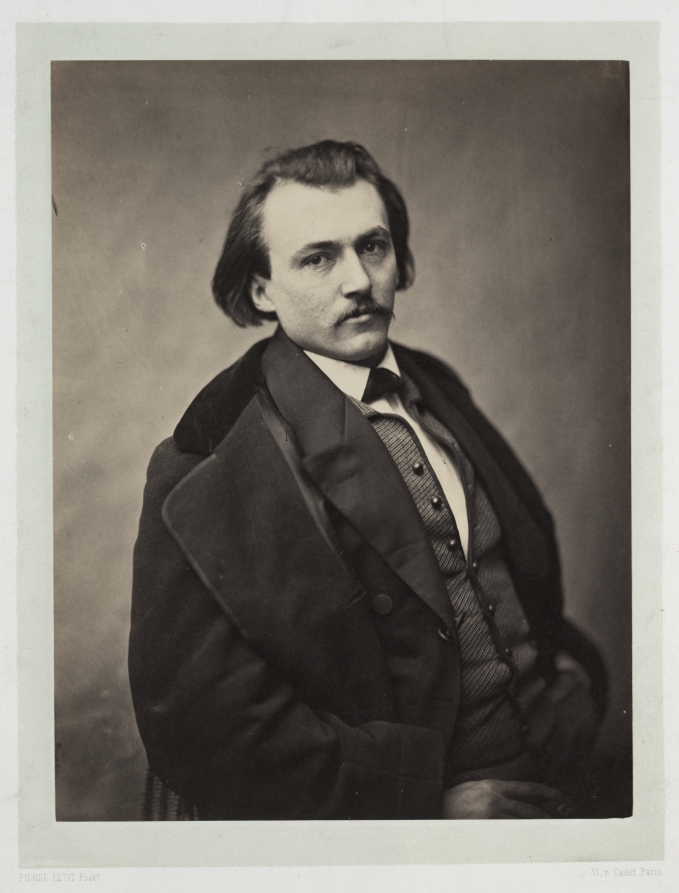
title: Gustave Doré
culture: France, 19th century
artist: Pierre Petit (French, 1832–1909)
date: 1860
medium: albumen print from wet collodion negative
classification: Photograph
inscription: written in pencil on verso: "67" "20 o M. Gustave Dor"